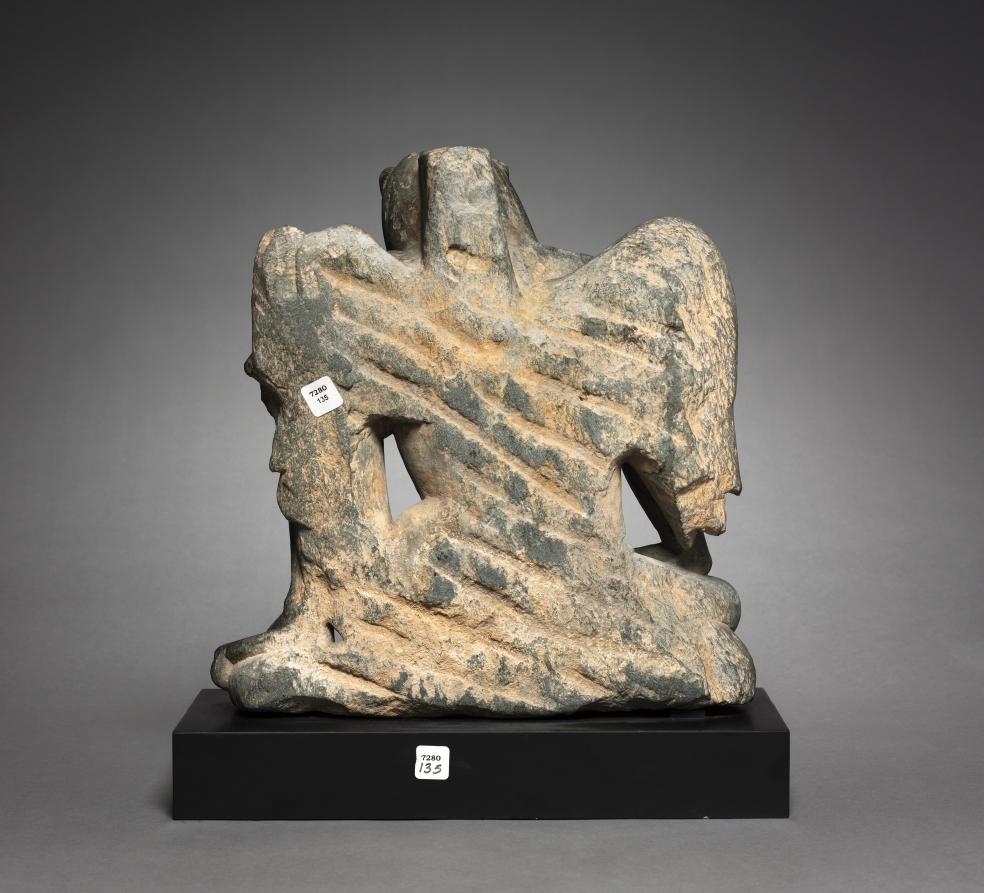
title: Winged Atlas-Hercules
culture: Pakistan, Gandhara, Gandhara period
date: 200s CE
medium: schist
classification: Sculpture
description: In Buddhist art of the Gandharan region during the time of heightened contact with the Mediterranean world, the figure of Atlas was adopted, but given wings so as to appear superhuman. This figure has been conflated with the image of Hercules, who wears the skin of the Nemean lion, and relieved Atlas of his duties for a short time. Repeated images of composite Atlas-like figures surrounded the base of the monuments called stupas, which were solid domes, and can be understood as symbols for the sky, which would have appeared as though supported by rows of titanic figures. Other examples of this figure hold a thunderbolt (vajra) in one hand, suggesting that he could also allude to Vajrapani, an early protector divinity of the Buddha. Images of Vajrapani can combine attributes of Hercules, Zeus, and Hermes.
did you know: This figure combines the attributes of Atlas, Hercules, and Vajrapani.